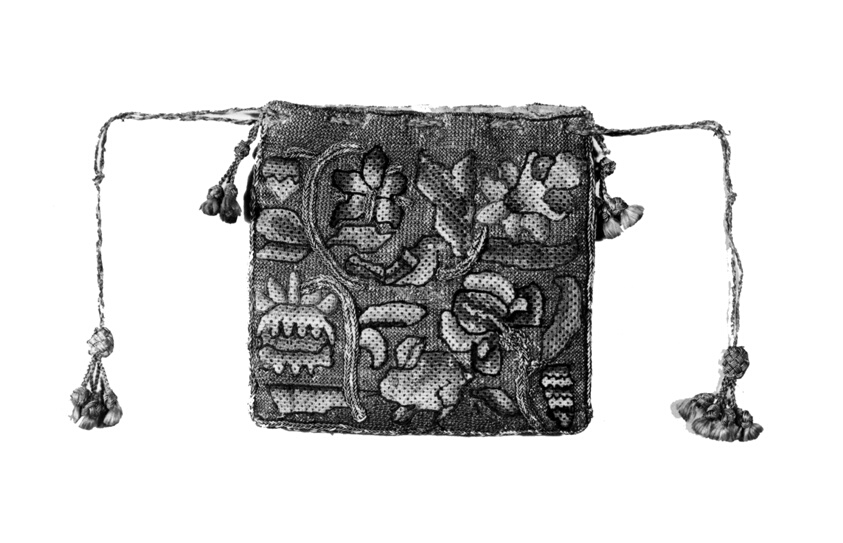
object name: Costume and Accessories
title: Bag (Needlework)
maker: England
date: 1601/25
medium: Linen, plain weave; embroidered in silk threads and silver-gilt strips wound around a silk fibre core in rococo and plait (thread counted) stitches, couching, plaited braid and woven rosettes; tassels made with silver-gilt threads in Turk's head knots; lined with silk, plain weave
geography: England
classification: textile; bag - needlework; costume accessory - bag; costume accessory; costume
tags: fashion